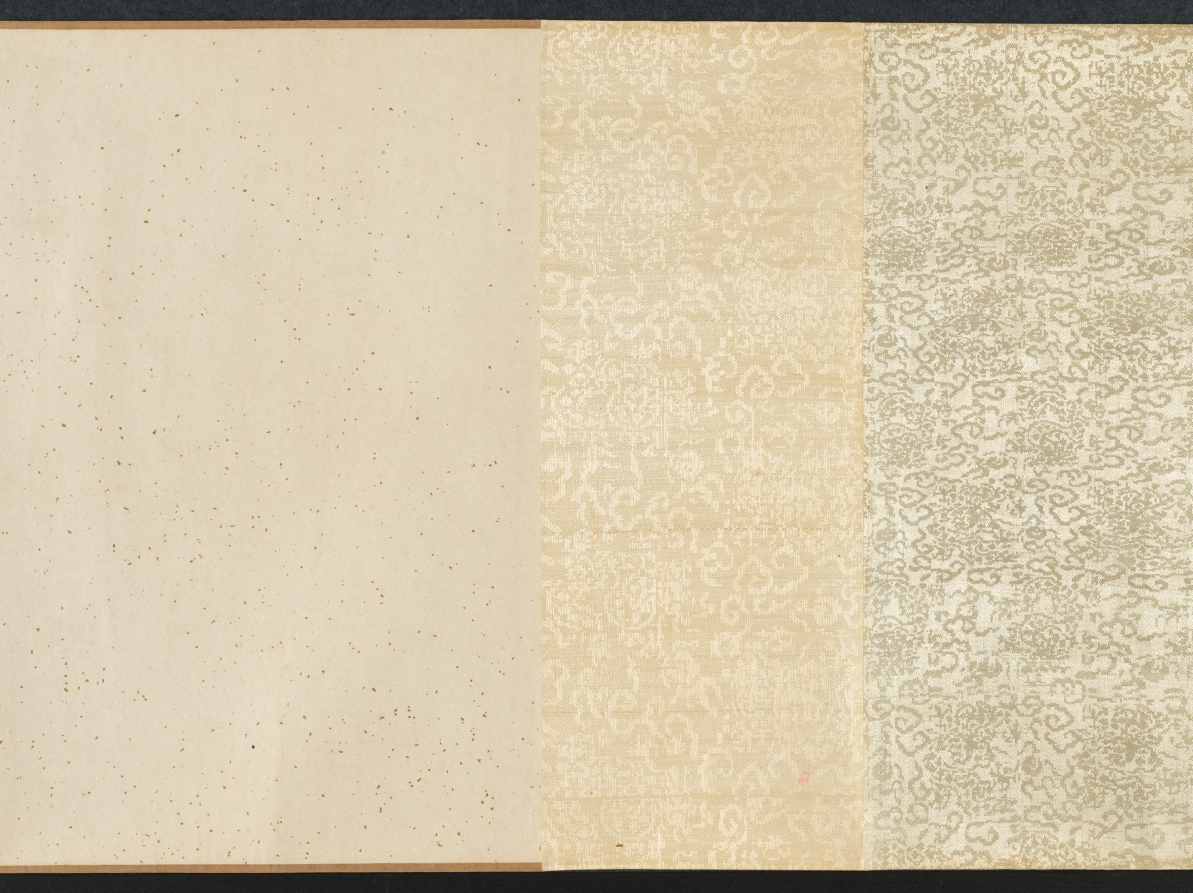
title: Landscape with Bamboo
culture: China, Yuan dynasty (1271-1368)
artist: Song Ke (Chinese, 1327–1387)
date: 1300s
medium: Handscroll; ink on paper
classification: Painting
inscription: 東吳宋克戲為仲幾畏友圖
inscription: 2 colophons and 14 additional seals: 1 seal of Yü Chung-chi (14th c.); 1 seal of Wu Ch'eng (1469 jinshi); 1 colophon and 2 seals of Wu K'uan (1435–1504); 1 colophon and 9 seals of Cheng Qi (1911–1988); 1 seal unidentified.